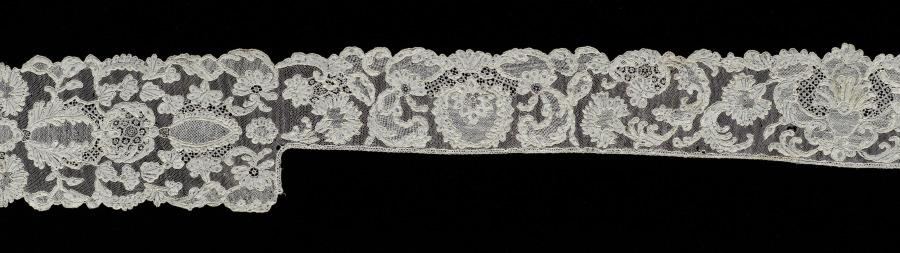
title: Lace Lappets and Edging for Cap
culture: France, Alençon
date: 1700–1715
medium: Needle lace (Point d'Alençon)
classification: Lace